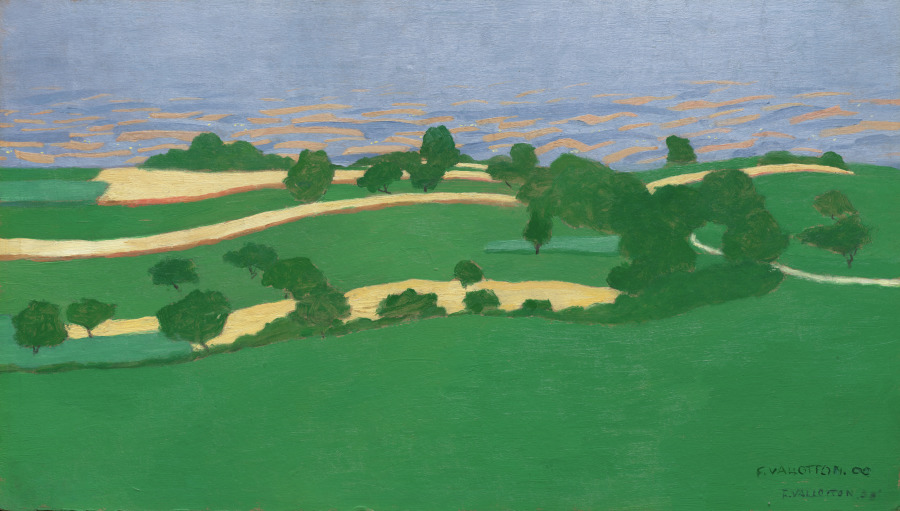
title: Corn Fields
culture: France, 19th century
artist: Félix Vallotton (Swiss French, 1865–1925)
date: 1900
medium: oil on board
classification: Painting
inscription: Signed and dated lower right (twice): F. VALLOTTON. 00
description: With the change of the century, Vallotton shifted his focus from printmaking to oil painting. Before 1900, the artist concentrated on precisely reproducing the world around him, but as seen in this painting, Vallotton’s work shows hints of ambiguity. The greenery blends together, and the distant horizon is described in simple curves of hills or clouds that fade into the sky.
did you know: In 1892, Vallotton joined a circle of French artists known as The Nabis (Prophets) who emphasized decoration, abstraction, and discrete, intimate emotion in their paintings.